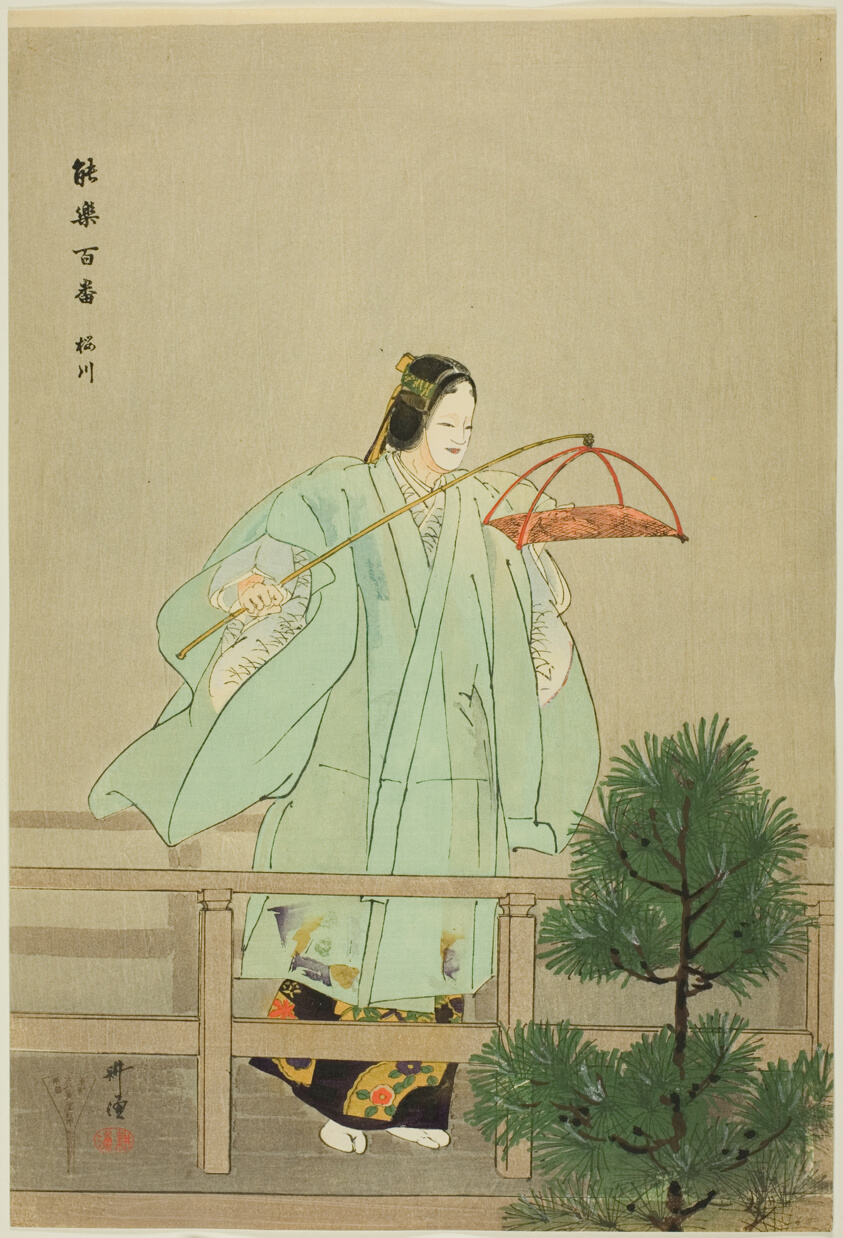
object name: Print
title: Sakuragawa, from the series "One Hundred No Dramas (Nogaku hyakuban)"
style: Japanese (culture or style)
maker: Tsukioka Kogyo; Japanese, 1869-1927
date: 1898/1903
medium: Color woodblock print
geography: Japan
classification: woodblock print; print; asian art